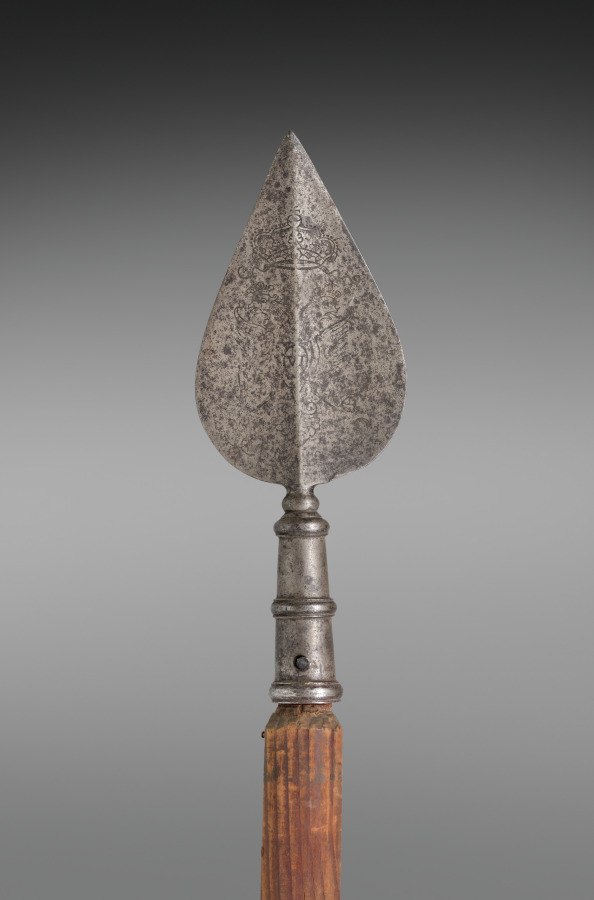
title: Banner with a Quartered Royal Arms of Spain and the Madonna and Child (pole)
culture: Spain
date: 1500s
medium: wood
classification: Arms and Armor